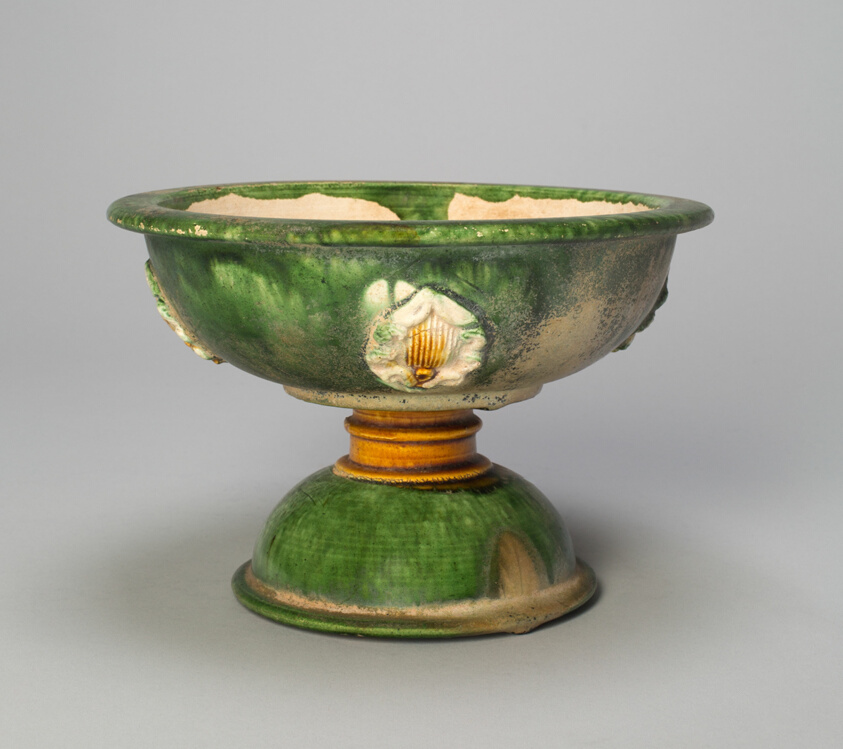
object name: Vessel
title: Stem Bowl with Foliate Medallions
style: Chinese (culture or style)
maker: China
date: Tang dynasty (618–906), first half of 8th century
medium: Earthenware with three color (sancai) lead glazes and underglaze molded decoration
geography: China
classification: bowl; earthenware; dish (vessel); asian art; ceramics; vessel